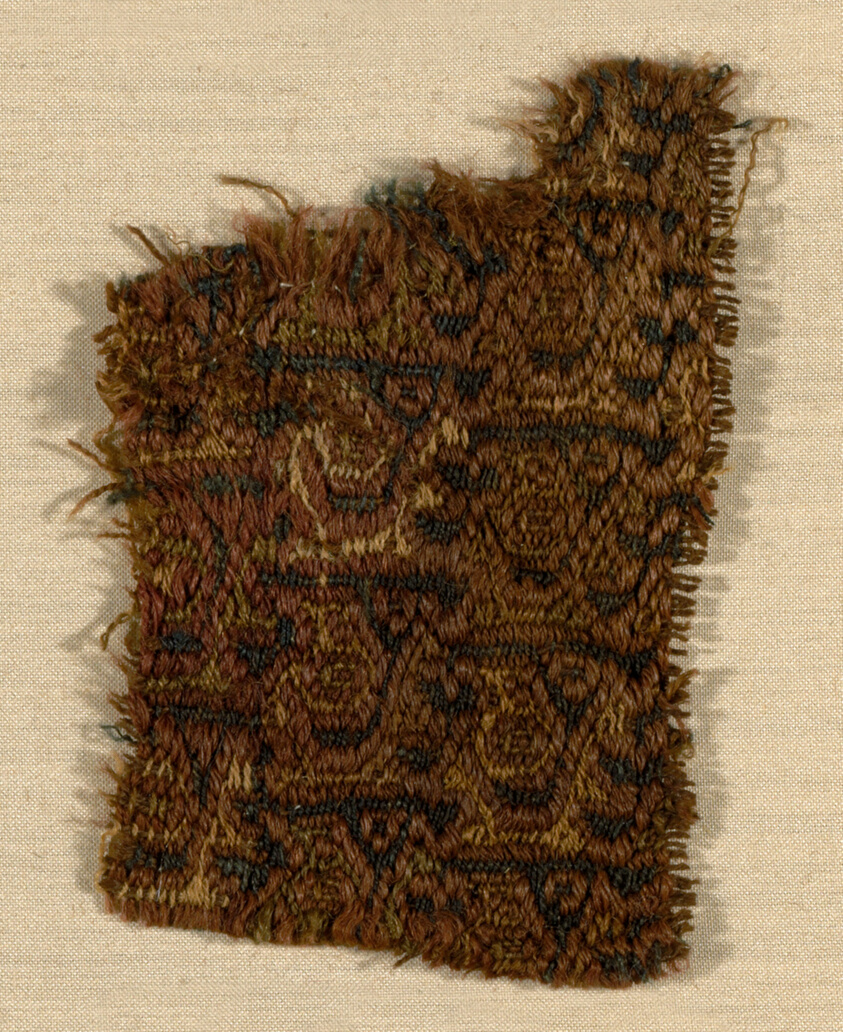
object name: Textile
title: Fragment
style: Chuquibamba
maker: Probably Chuquibamba; Probably south coast, Peru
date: A.D. 1476/1532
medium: Plain compound cloth (old card)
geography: Peru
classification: textile; weaving